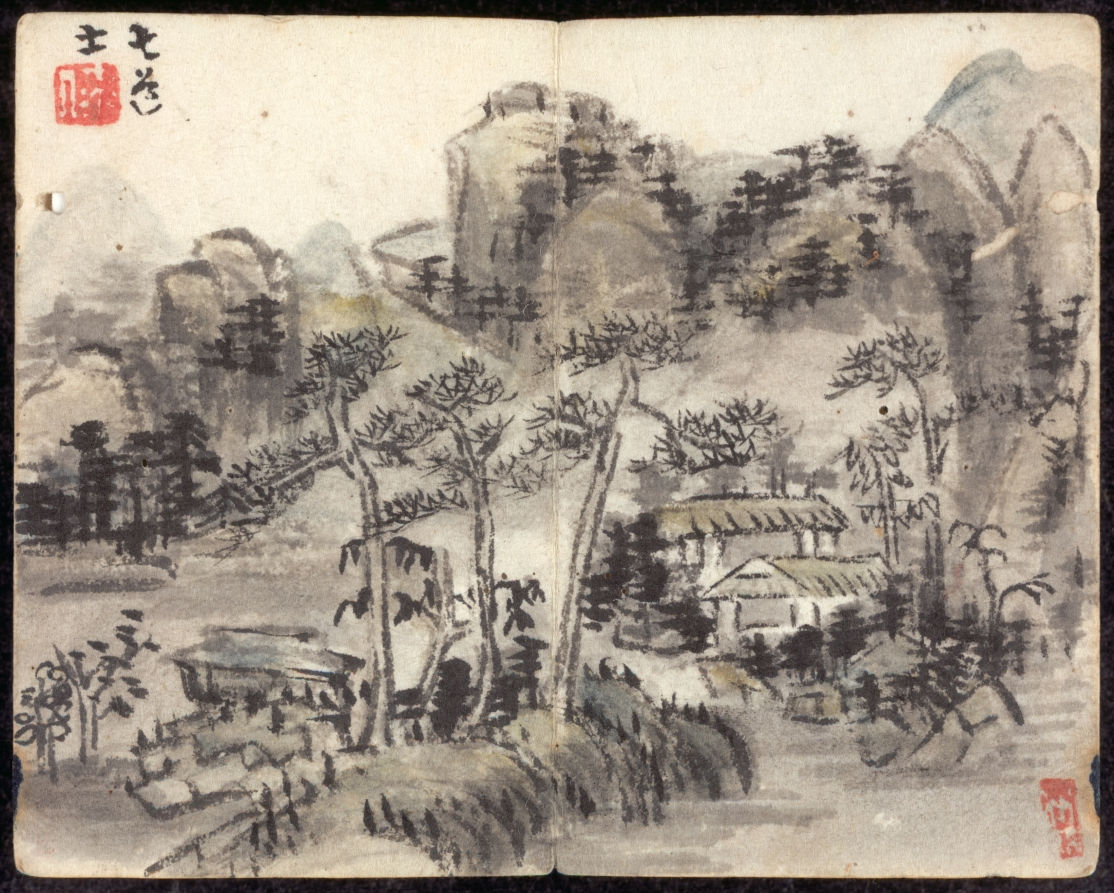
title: Miniature Album with Figures and Landscape (Landscape with Two Buildings)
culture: China, Qing dynasty (1644–1911), Qianlong reign (1736–95)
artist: Zeng Yandong (Chinese, c. 1751–1827)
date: 1822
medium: album leaf, ink and color on paper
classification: Painting